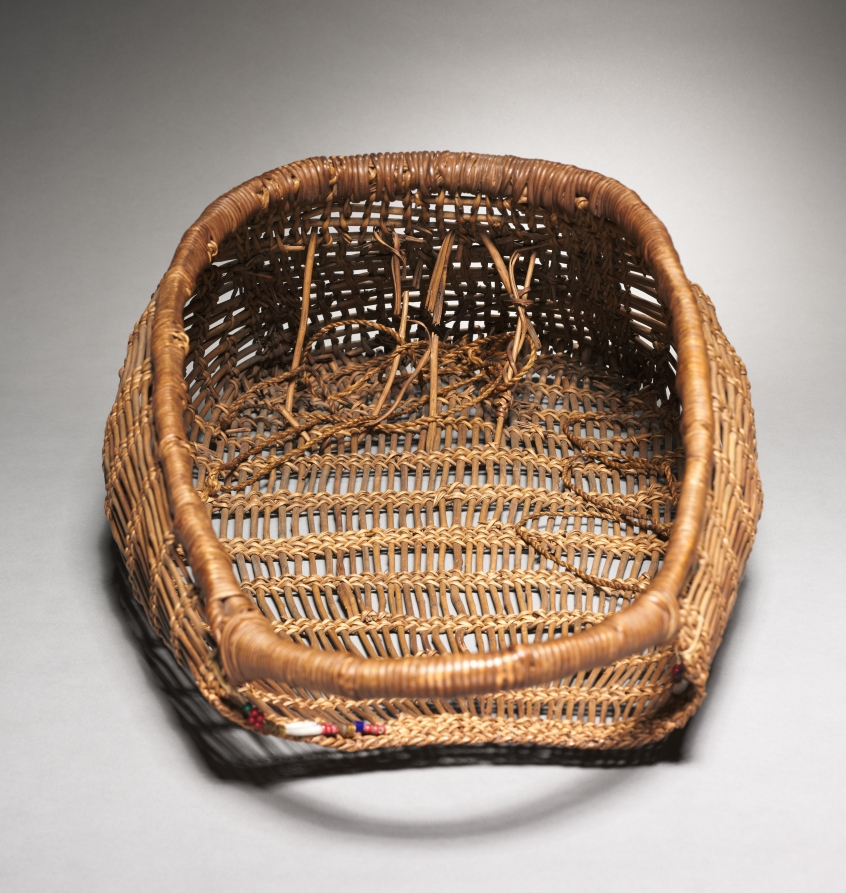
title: Cradle Basket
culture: California, Yurok or Hupa, Late 19th century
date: c 1875– 1910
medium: twined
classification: Basketry